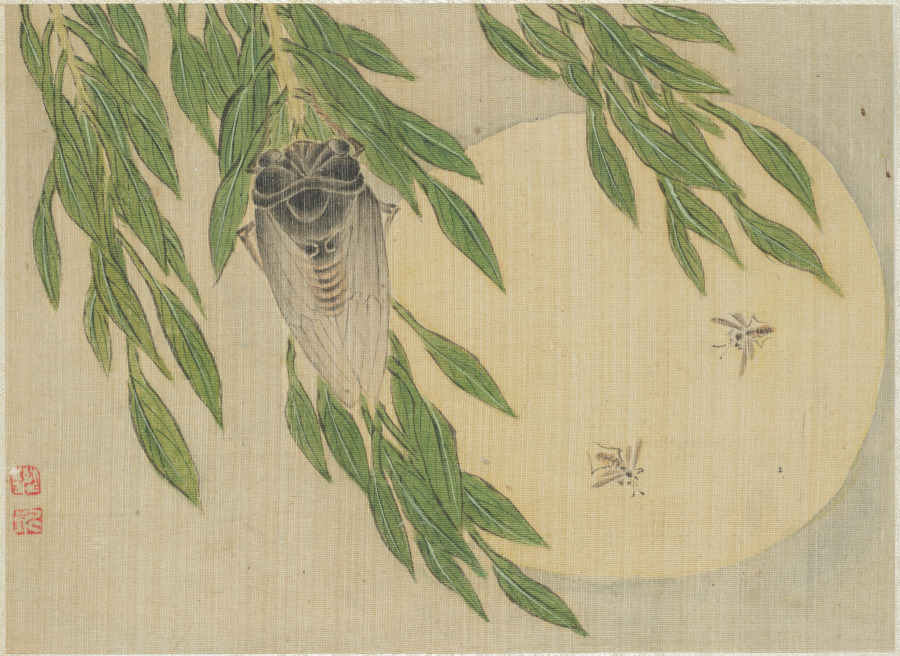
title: Album of Miscellaneous Subjects, Leaf 6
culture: China, Qing dynasty (1644-1911)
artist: Fan Qi (Chinese, 1616–after 1694)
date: early 1650s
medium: album leaf, ink and color on silk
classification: Painting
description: Zhou Yi's calligraphy is across from the painting on leaf six. His colophon reads: The bright moon emerges through the willow, The fragrance of flowers is already difficult to retain. Listening above these tall branches, I sense that faraway in my native place autumn has arrived. Obstructed, all the diminished waters flow, Abruptly the sound of a lute wafts to and fro. A strong wind, unabated, blows among the willow branches.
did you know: A cicada clings to a willow branch while two bees fly in the moonlight .